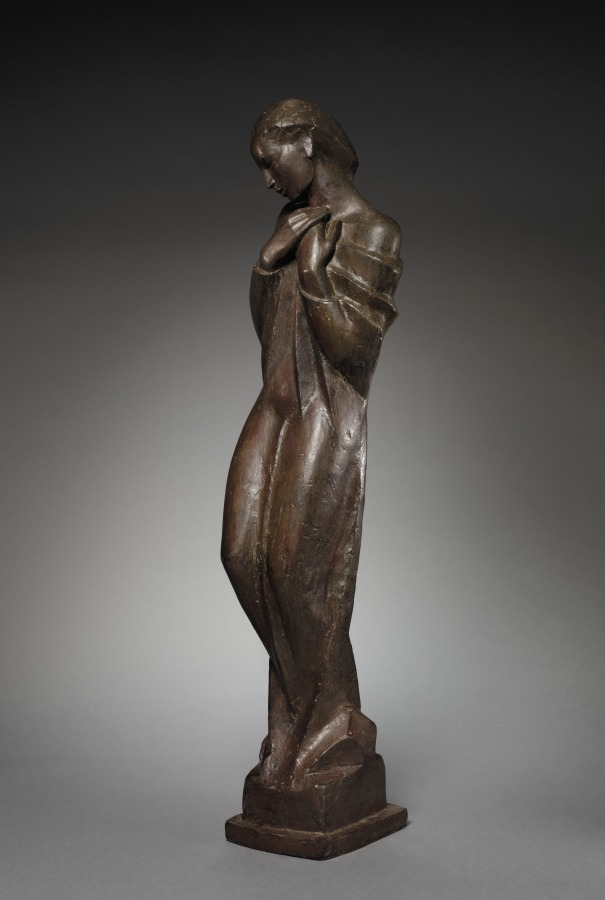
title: Adagio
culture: Germany, 20th century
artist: George Kolbe (German, 1877–1947)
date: 1923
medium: gilt bronze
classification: Sculpture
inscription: Signed lower left corner: "GK II"